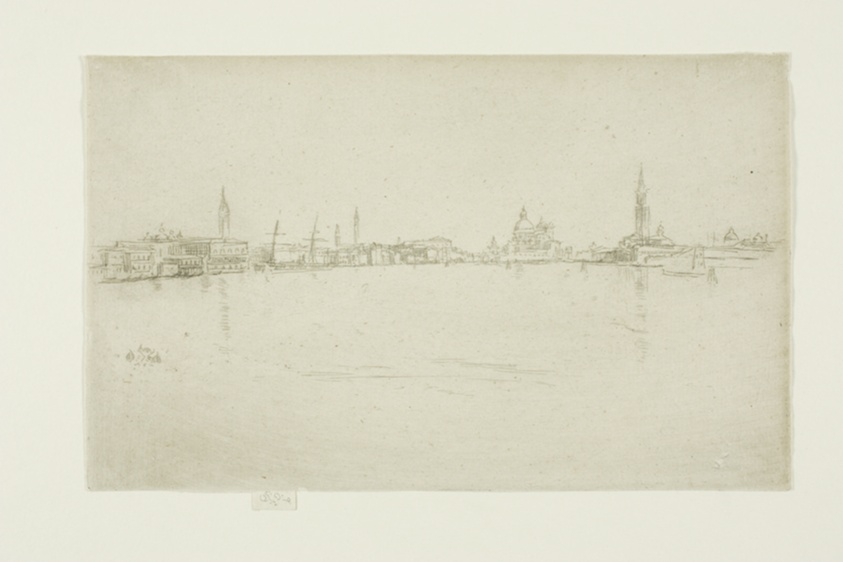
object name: Print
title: Salute Dawn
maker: James McNeill Whistler (American, 1834-1903)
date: 1879/80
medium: Etching and drypoint with foul biting in black ink on ivory laid paper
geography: United States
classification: etching; foul biting; print; prints and drawing; paper; drypoint